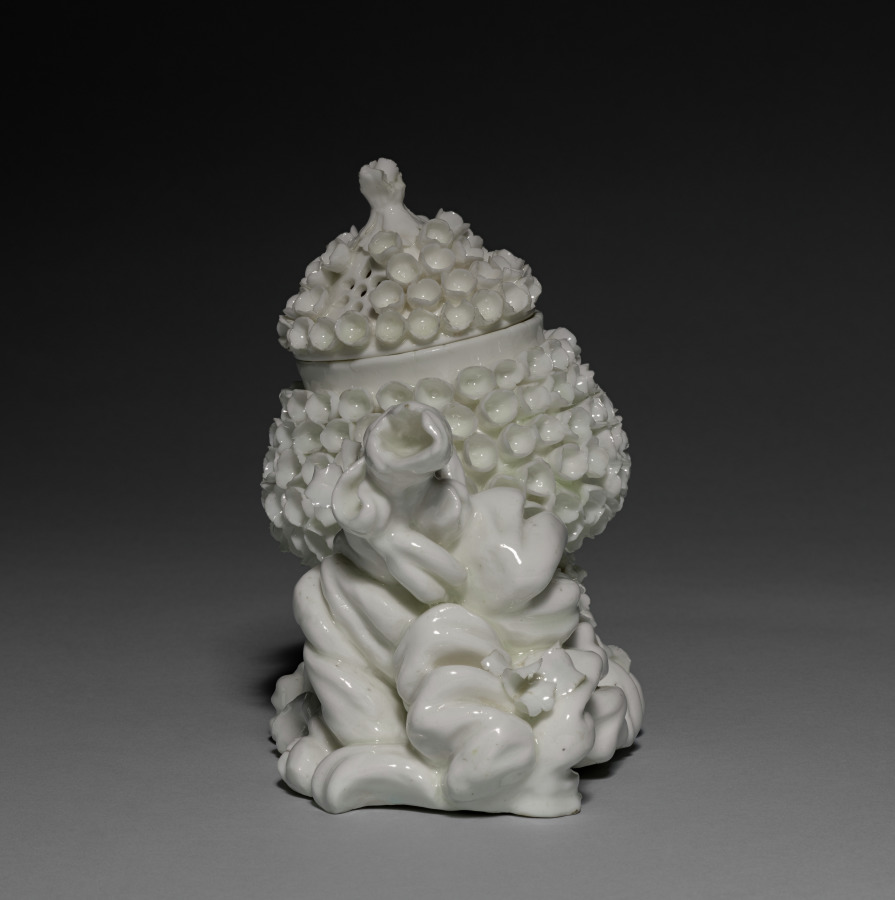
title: Potpourri Vase with Cover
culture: France, Vincennes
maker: Mennecy Factory (French)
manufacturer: Vincennes Porcelain Factory (France, 1740–56)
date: c. 1750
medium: soft-paste porcelain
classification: Ceramic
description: The delicate flowers that cover the lid and base of this vase draw inspiration from the schneeballblüten, or guelder rose, pattern produced at the German Meissen porcelain factory. The flowers on the lid are spaced by small, unobtrusive perforations that allow the scent of the potpourri, a mixture of flowers, herbs, and spices placed inside this vase, to disperse.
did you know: This style of potpourri vase, a pot atop a rockwork base, was popularly produced by major 18th-century porcelain factories including those at Vincennes, Chantilly, and Saint-Cloud.